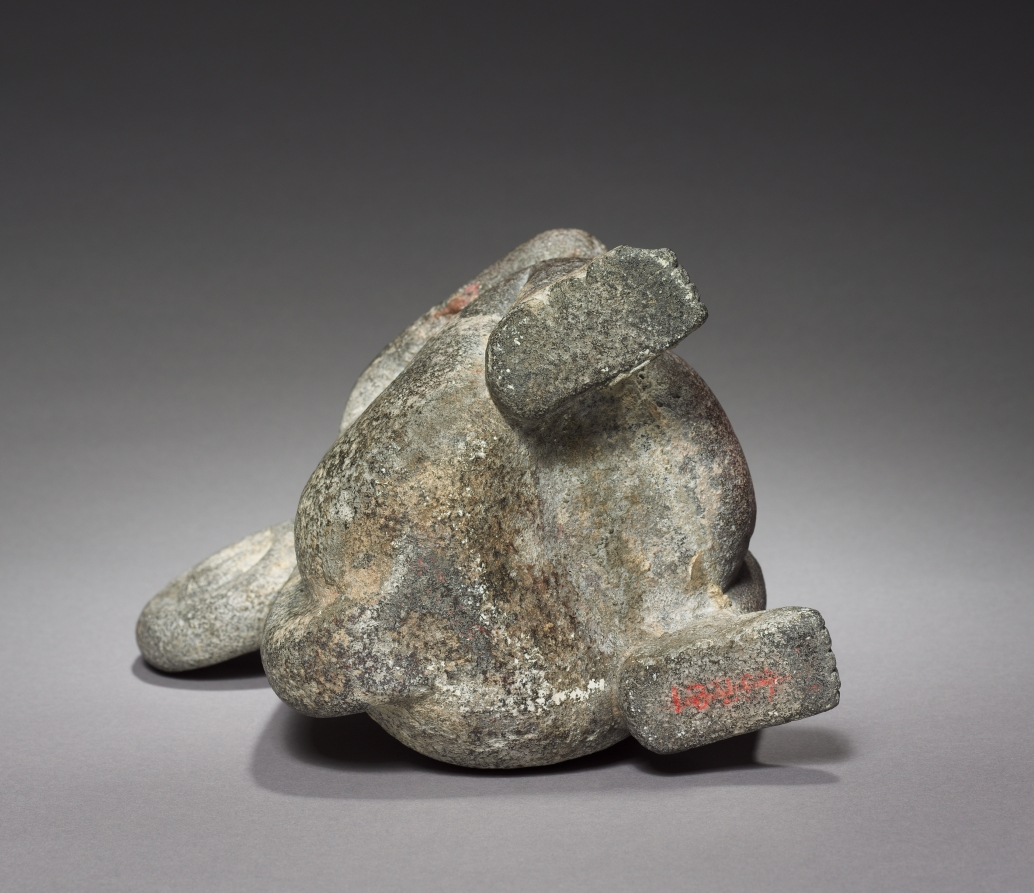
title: Monkey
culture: Central Mexico, Tacuba, Aztec, Post-Classic Period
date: 1325–1519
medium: stone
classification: Stone